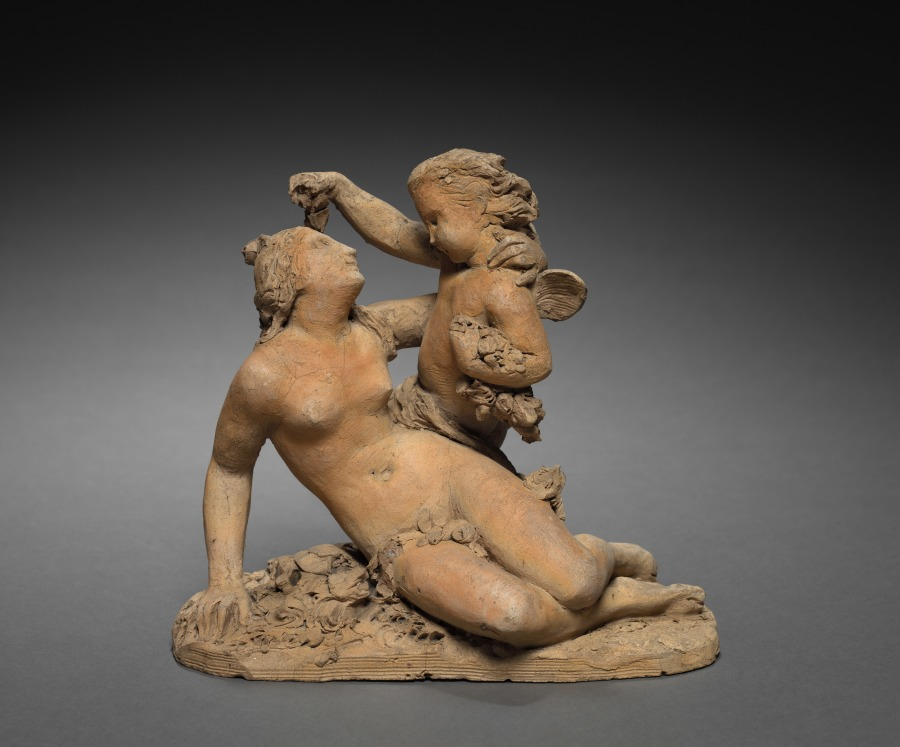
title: Venus and Cupid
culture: France, 19th century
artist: Jean-Jacques Feuchère (French, 1807–1852)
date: c. 1840–1850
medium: terracotta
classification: Sculpture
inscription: in ligature incised into base at front right corner: "Feuchere"; below are some marks that might be a date, but are illegible.